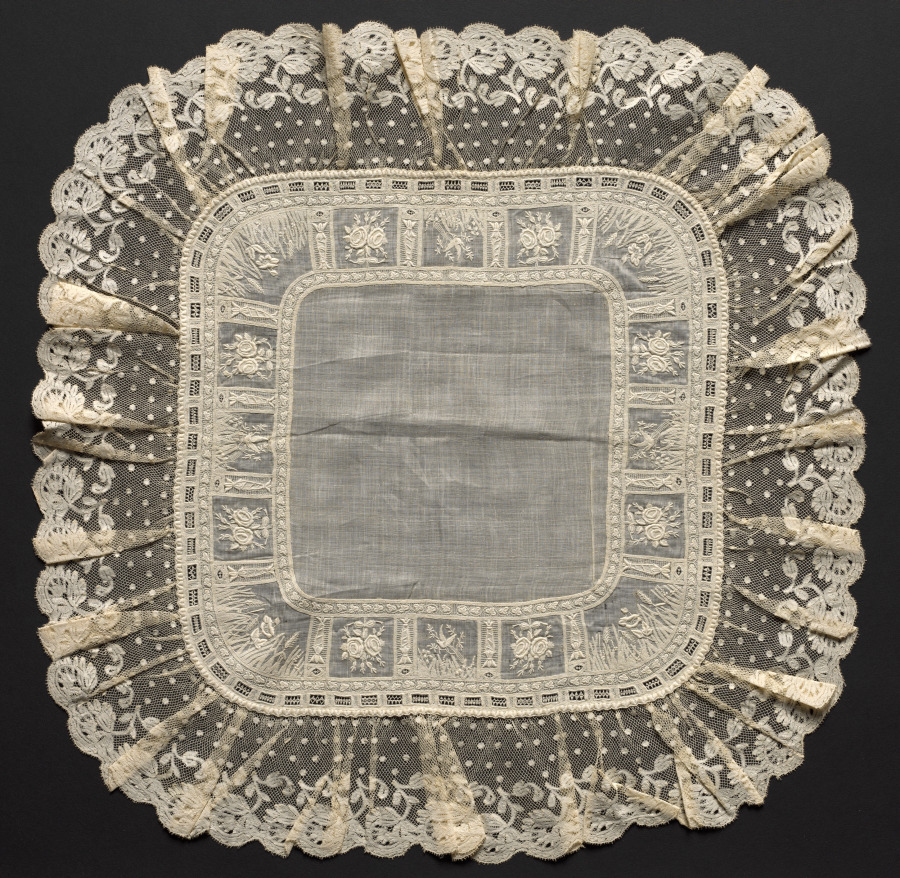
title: Lace Handkerchief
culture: Switzerland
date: 1800–1820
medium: Plain weave linen center with bobbin lace (Valenciennes lace) edging and embroidery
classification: Embroidery